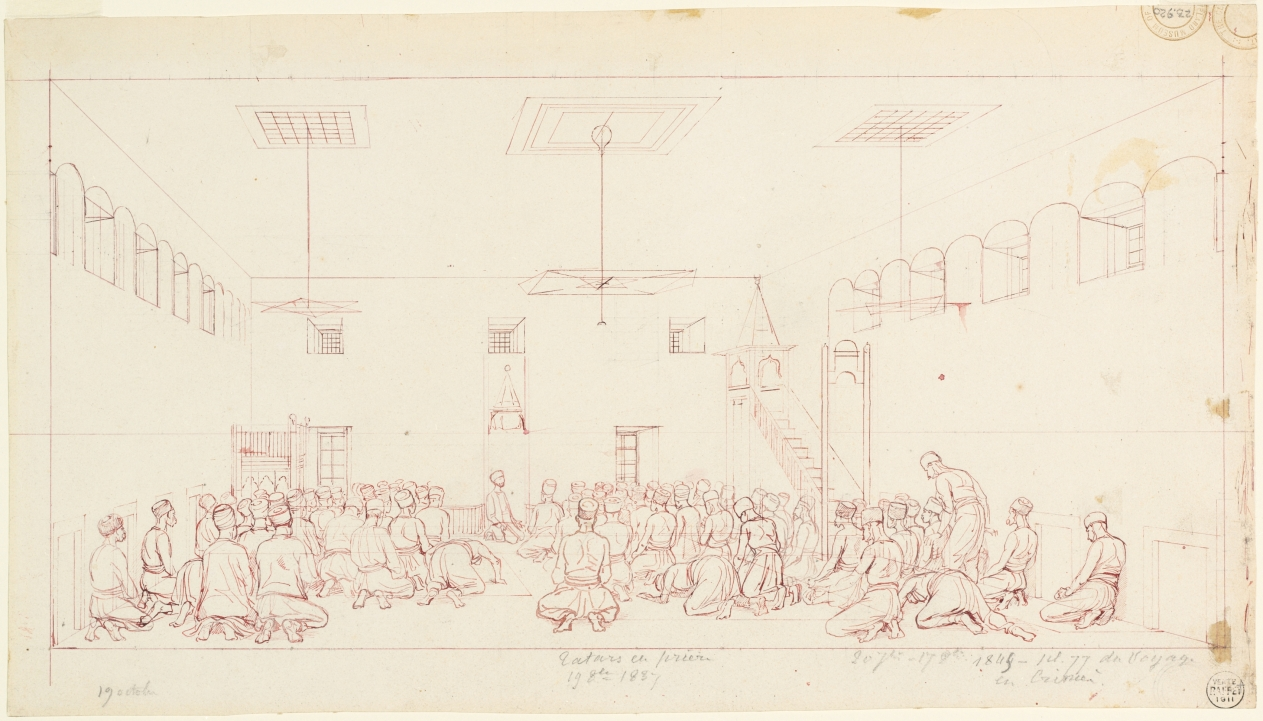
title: Tartars at Prayer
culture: France, 19th century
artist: Auguste Raffet (French, 1804–1860)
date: 1837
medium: pen and red ink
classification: Drawing